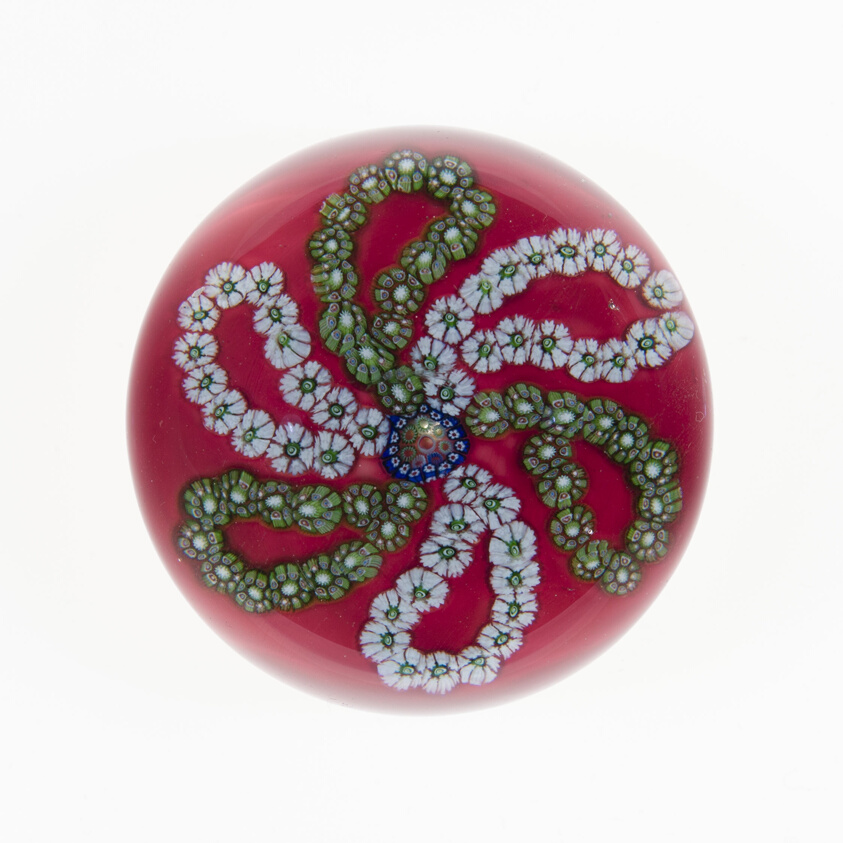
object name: Glass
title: Paperweight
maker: Saint-Louis Glassworks (Cristalleries de Saint-Louis); Lorraine, France, founded 1586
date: c. 1845/60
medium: Glass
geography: Saint-Louis-lès-Bitche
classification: paperweight; glass